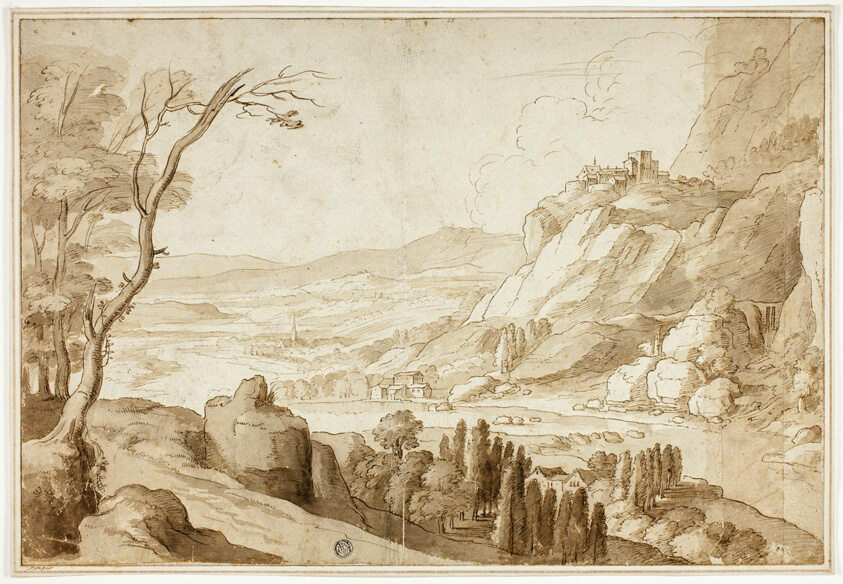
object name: Drawing and Watercolor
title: Rhine Landscape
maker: Possibly Willem van Nieuwlandt, II (Flemish, c. 1584-after 1635); or possibly after Joos de Momper, II (Flemish, 1564-1635)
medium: Pen and brown ink, with brush and brown wash, over traces of black chalk, on ivory laid paper, pieced and laid down on ivory laid paper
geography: Flanders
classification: ink or chalk wash; drawings (visual works); prints and drawing